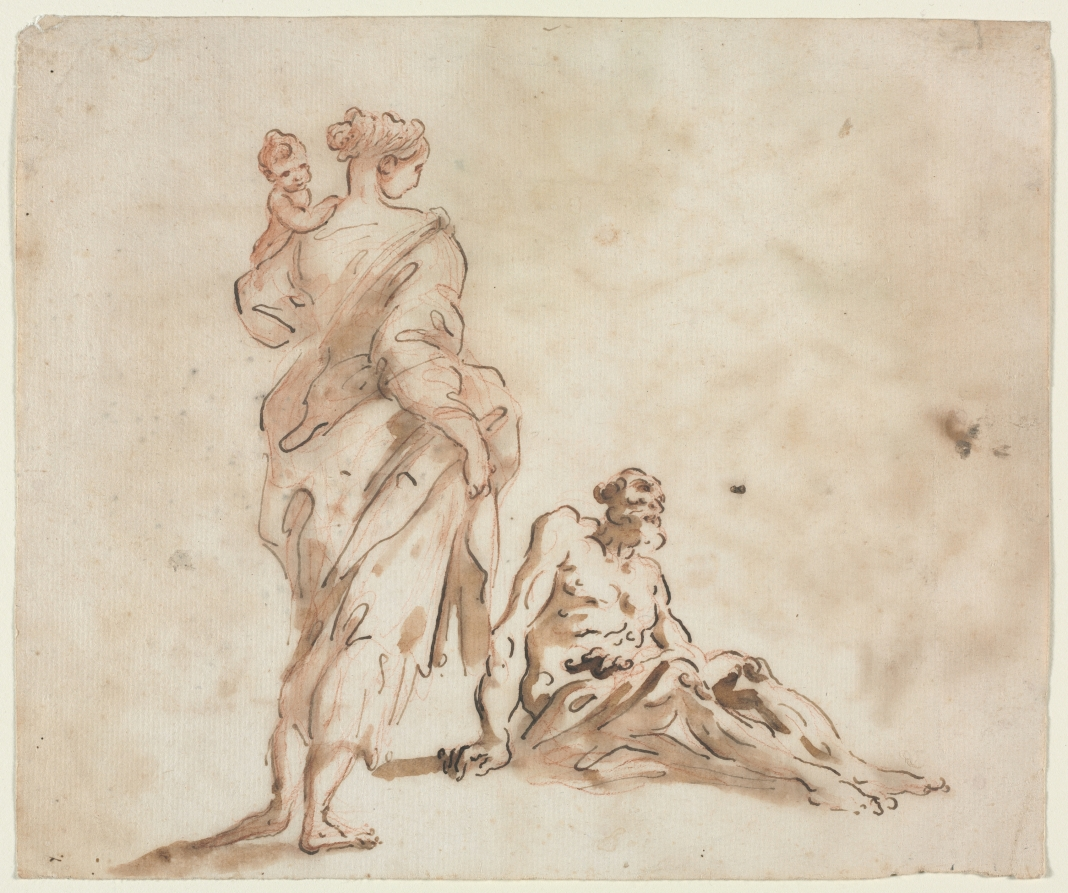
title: A Standing Woman Holding a Child, a Seated Male at her Feet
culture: Italy, 18th century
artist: Alessandro Magnasco (Italian, 1667–1749)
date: first half 18th century?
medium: pen and brown ink with brush and brown wash over red chalk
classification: Drawing